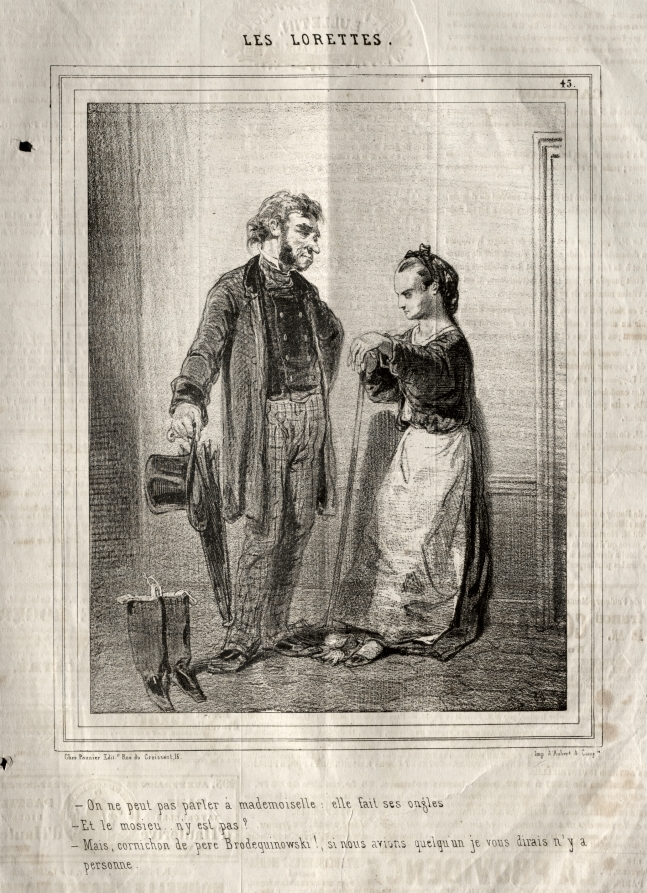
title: Les Lorettes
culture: France, 19th century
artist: Paul Gavarni (French, 1804–1866)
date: 1842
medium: lithograph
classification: Print